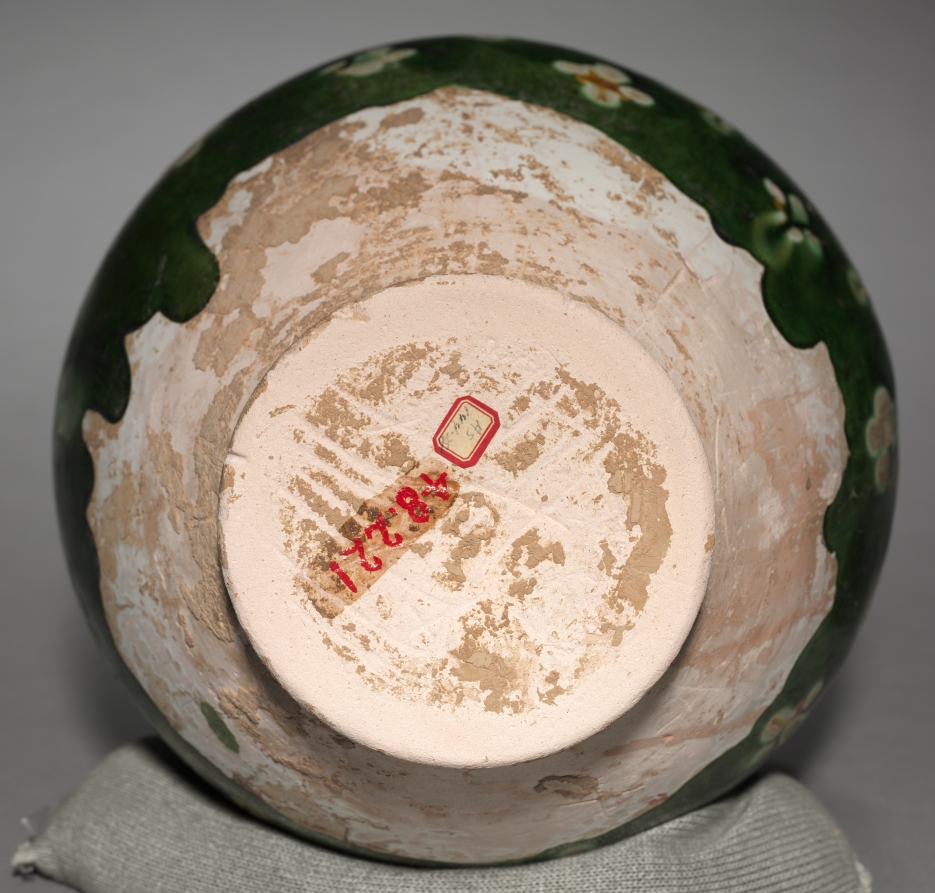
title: Jar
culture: China, Tang dynasty (618-907)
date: late 600s–700s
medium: glazed pinkish-buff earthenware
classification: Ceramic